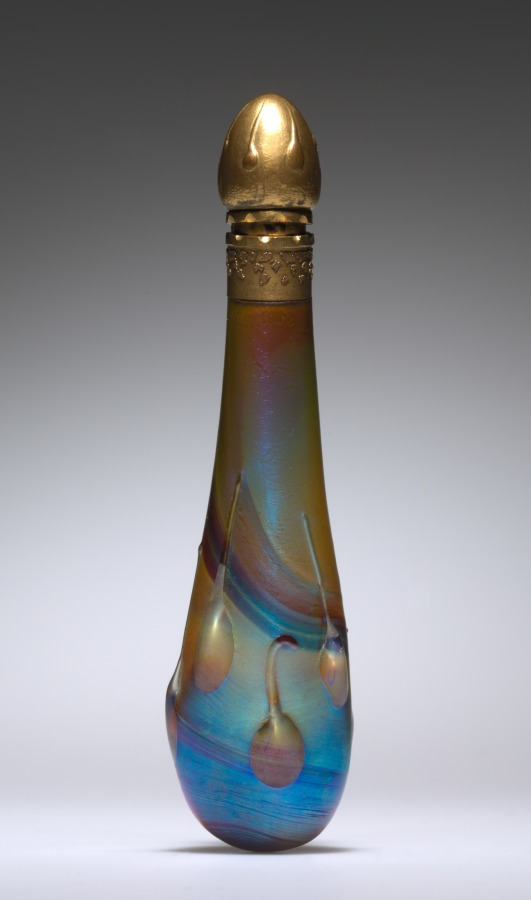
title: Perfume Bottle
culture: America, New York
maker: Tiffany Studios (United States, New York, 1902–32)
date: c. 1905–10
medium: Favrile glass with gilt metal cover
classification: Glass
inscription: inscribed at neck: Louis C. Tiffany °6837.